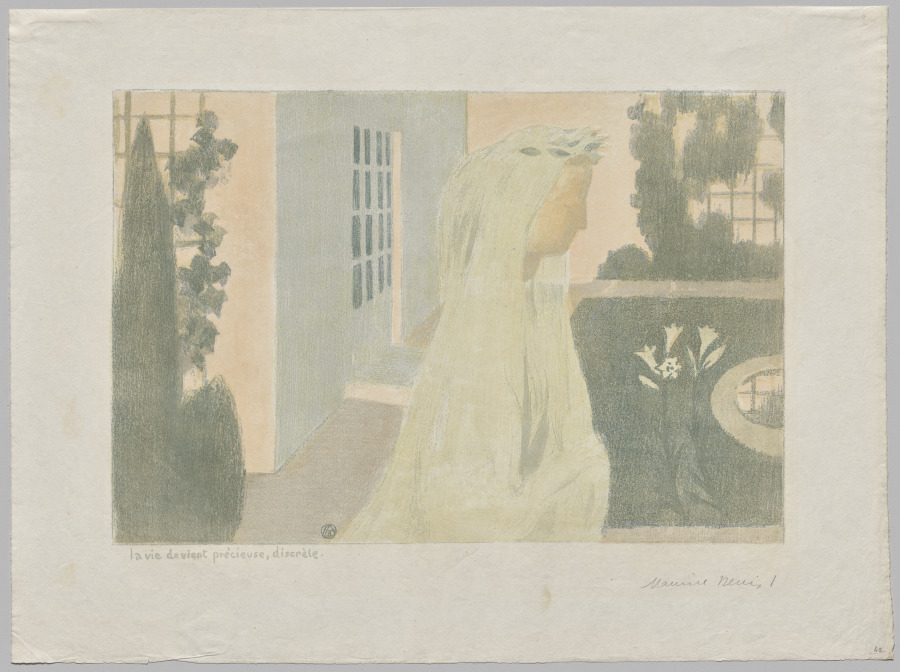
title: Life Becomes Precious, Discreet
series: Love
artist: Maurice Denis (French, 1870–1943)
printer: August Clot (French, 1858–1936)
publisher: Ambroise Vollard (French, 1867–1939)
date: 1899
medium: color lithograph on wove paper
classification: Print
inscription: Recto, lower left: “la vie deviant précieuse, discrete”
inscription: In graphite, recto, lower right: “Maurice Denis (signed)”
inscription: In graphite recto, lower right: “42”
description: Maurice Denis belonged to the Nabis, a group of artists who came together in 1889 to pursue a radical new style informed by subjective experience and emotion. This print is from a series in which Denis explored his devotion to his wife, Marthe, by depicting her in a variety of settings alongside titles drawn from his own journal. The vague but evocative images were meant to encourage the viewer to draw connections to the theme and meditate on its meaning.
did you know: Maurice Denis was a devout Catholic and often drew visual connections between his wife, Marthe, the subject of this print series, and the Virgin Mary.